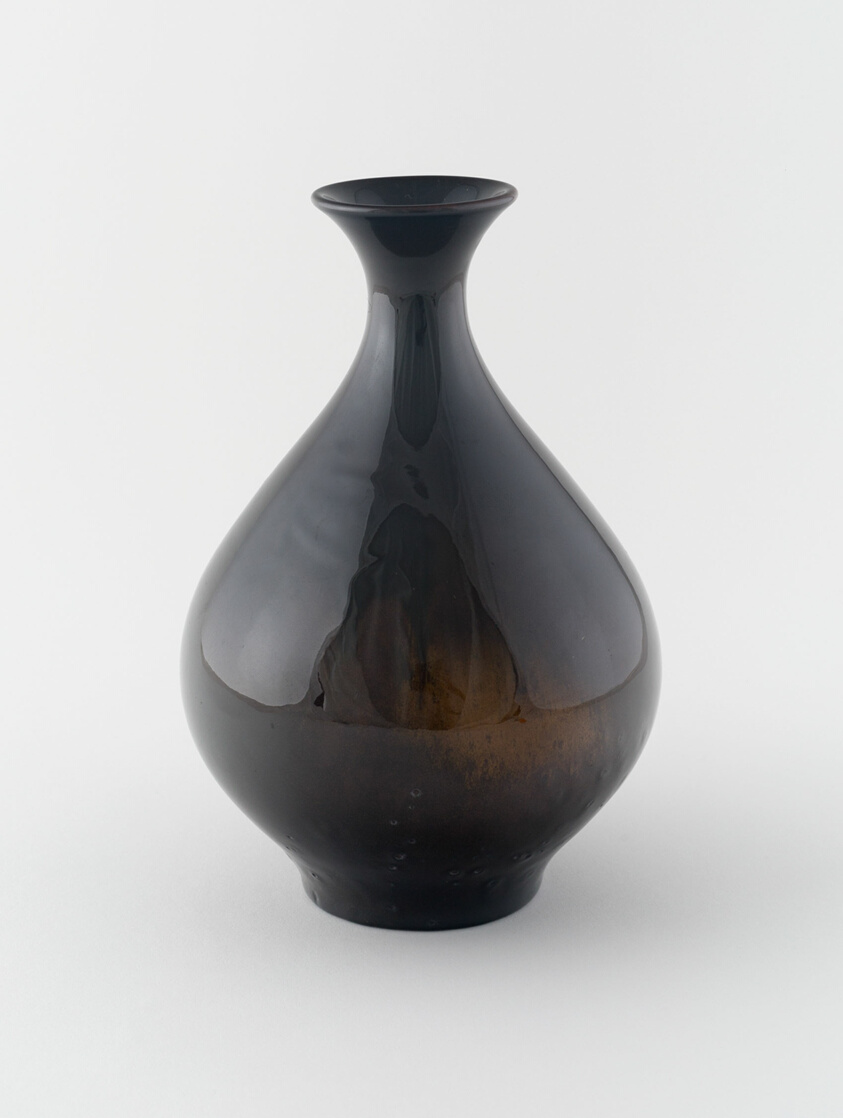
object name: Ceramics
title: Vase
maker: Decorated by Albert Robert Valentien (American, 1862-1925); Rookwood Pottery (American, 1880-1967); Cincinnati, Ohio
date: 1896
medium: Earthenware and glaze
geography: Cincinnati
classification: american decorative arts; earthenware; pottery; vase; american arts; ceramics; decorative arts